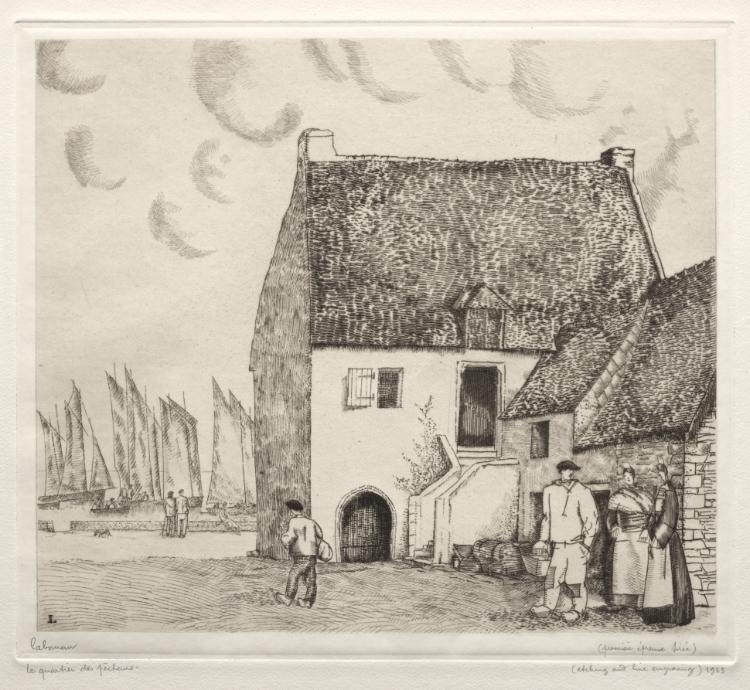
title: Fishermen's Quarters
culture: France, 20th century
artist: Jean-Émile Laboureur (French, 1877–1943)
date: 1933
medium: etching and line engraving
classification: Print